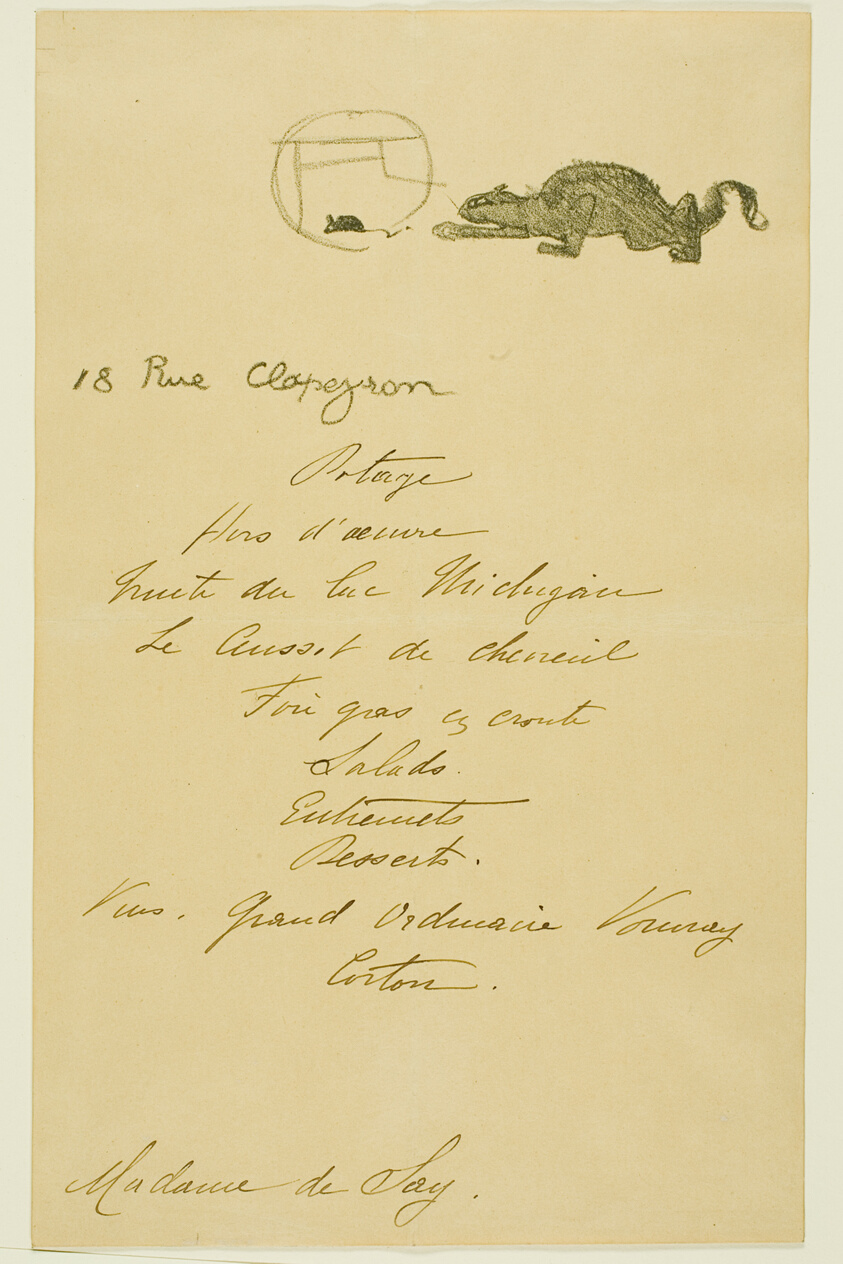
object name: Print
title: Menu for a Dinner given by May Belfort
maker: Henri de Toulouse-Lautrec (French, 1864-1901)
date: 1896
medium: Color lithograph on tan wove paper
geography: France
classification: lithograph; print; prints and drawing